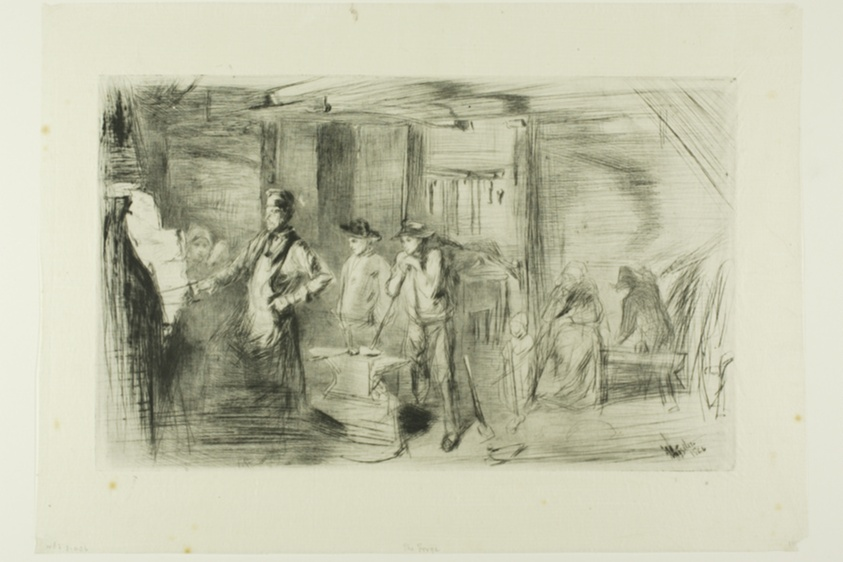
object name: Print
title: The Forge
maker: James McNeill Whistler (American, 1834-1903)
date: 1861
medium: Drypoint in black ink on cream Japanese paper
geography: United States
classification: drypoint; print; prints and drawing; paper